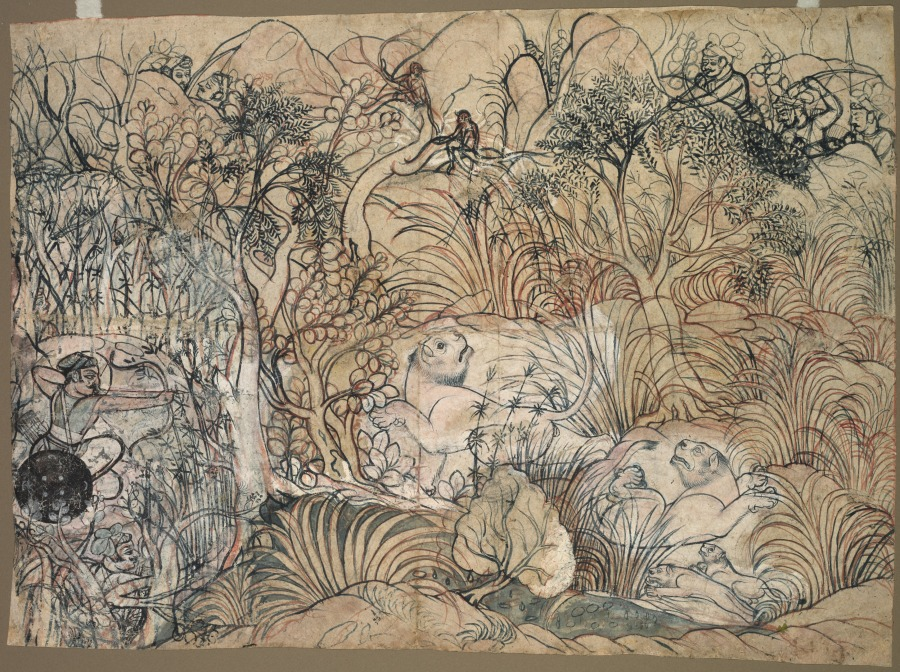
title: Umed Singh of Kota Hunting Lions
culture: India, Rajasthan, Kota, 18th century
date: c. 1785–1790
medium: brush drawing with slight color on paper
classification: Painting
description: A family of lions with two cubs is caught unawares by royal huntsmen amid a tangle of jungle by the side of a stream. The adult lions twist around, startled by the sound of the horn intended to drive them out of the safety of their glade. The men, other than the ruler at the left, have turbans camouflaged with leaves, and they surround the lions, ready to let spears and arrows fly. Before embarking on a costly finished painting, Indian artists often made preparatory sketches, in which they worked out the particulars of the composition. Whiter sections indicate areas where erasures and adjustments were made. Freer in execution, the drawings are often more evocative and exuberant than the more formal full-color finished paintings.